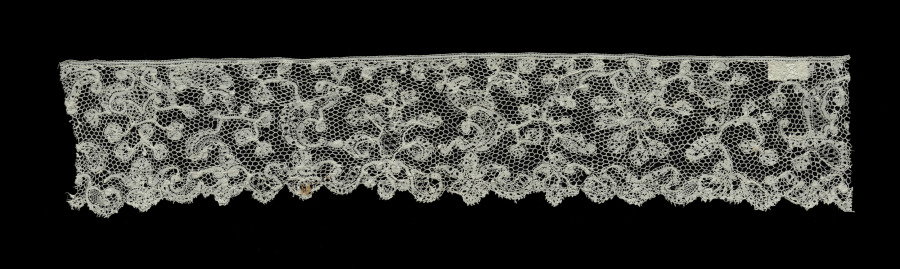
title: Lace Edging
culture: Flanders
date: 1700s–1800s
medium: Linen: bobbin lace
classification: Lace